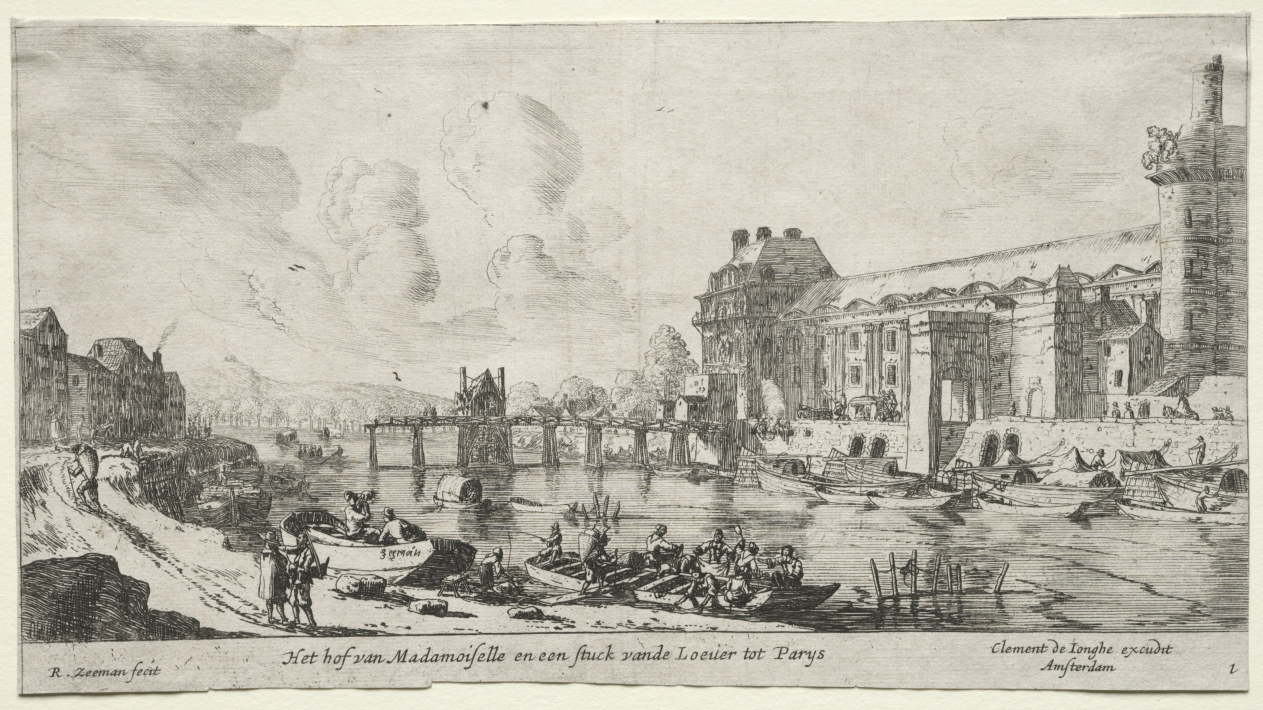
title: Views of Paris: View of the Louvre and the Tuileries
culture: Netherlands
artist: Reinier Nooms, called Zeeman (Dutch, c. 1623–1664)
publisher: Clement de Jonghe (Dutch, 1579–1679)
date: 1650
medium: etching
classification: Print